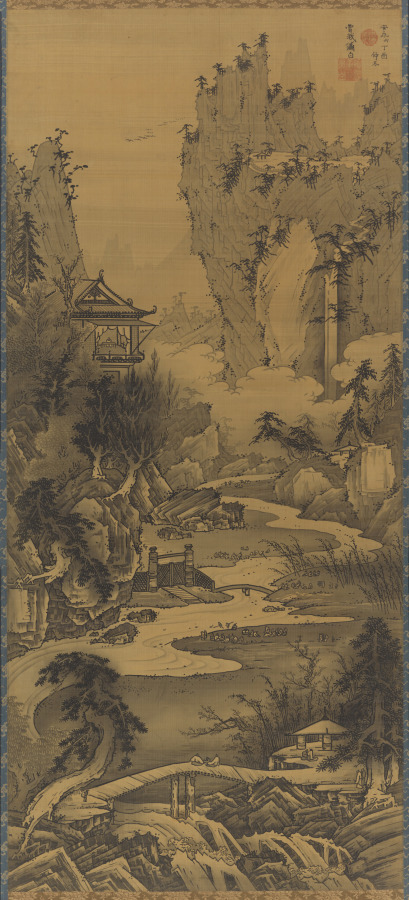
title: Orchid Pavilion Gathering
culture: Japan, Edo period (1615–1868)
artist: Soga Shōhaku (Japanese, 1730–1781)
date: 1777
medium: hanging scroll; ink on silk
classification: Painting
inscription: Inscribed upper right: Sixth year of An'ei (1777) mid-winter, Soga Shohaku Seal: Dasokken Shohaku Seal: Unread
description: This painting depicts a famous gathering that took place in China in AD 353 to celebrate the Spring Purification Festival, also known as the Double Third Festival, as it takes place on the third day of the third lunar month. The host invited everyone to the Orchid Pavilion to compose poetry and drink wine. Guests floated wine cups down a nearby creek, and where they landed, people had to drink the wine and compose a poem.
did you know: The Buddhist temple Bairinji in Kurume City, Fukuoka prefecture, Japan, and the National Gallery of Victoria in Melbourne, Australia, own compositions by the same artist on the same theme.